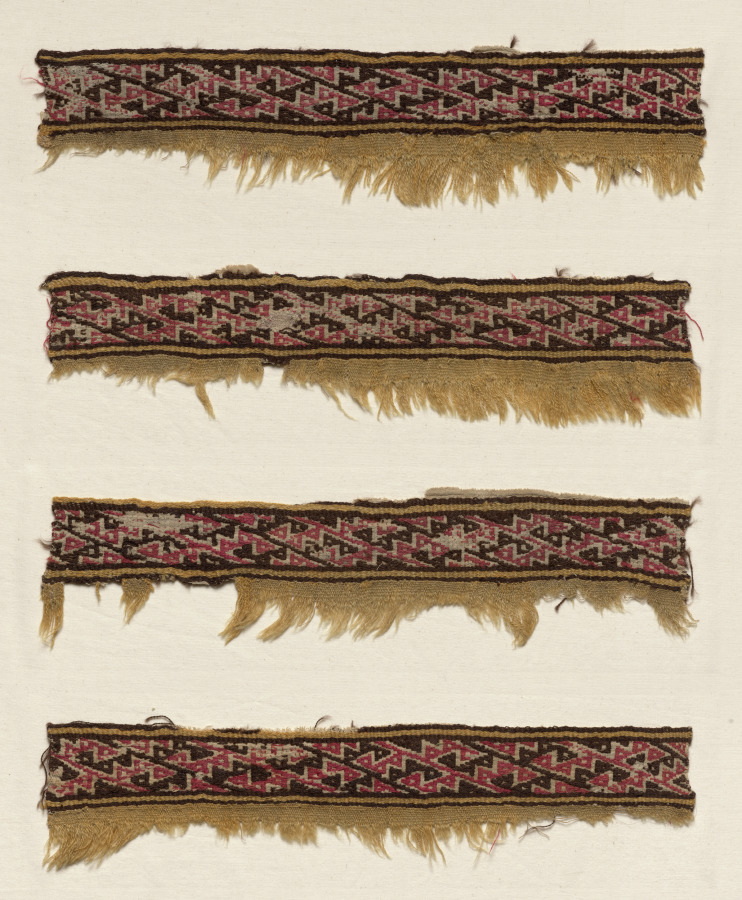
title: Four Border Strips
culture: Peru, Central Coast, Chancay, 12th-15th century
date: c. 1100–1400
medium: plain compound cloth; cotton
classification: Textile